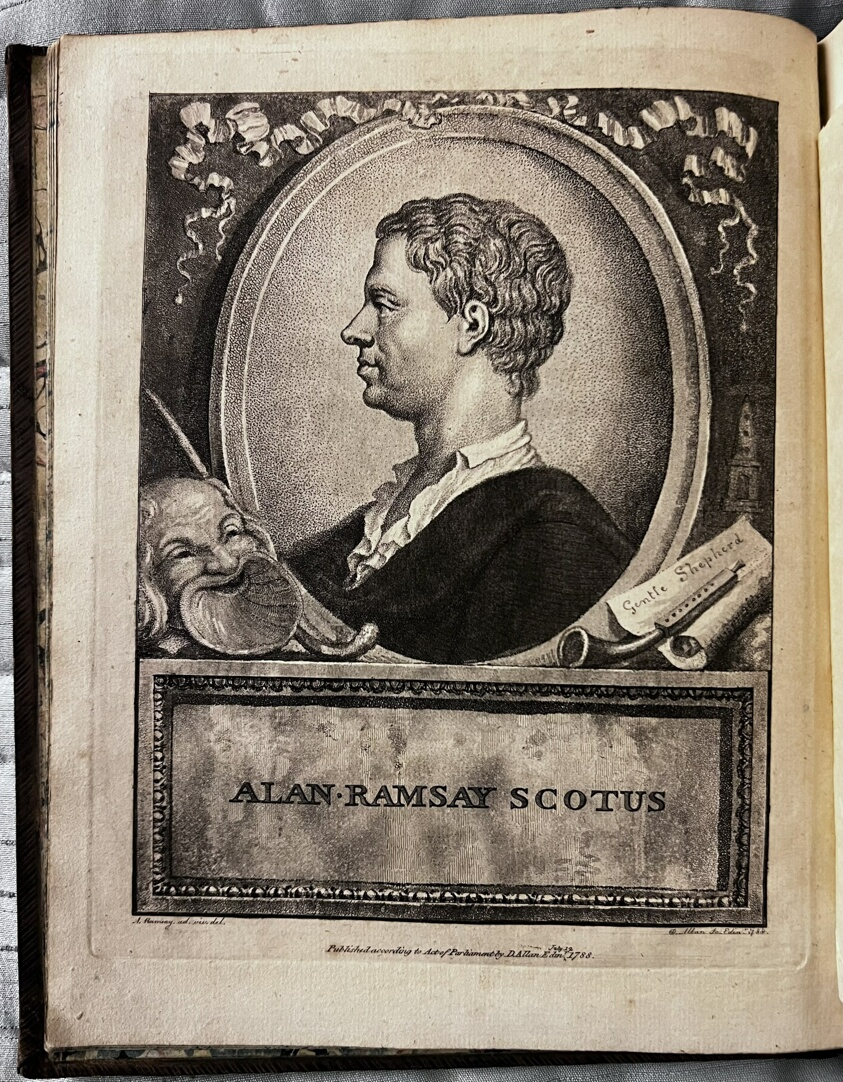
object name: Book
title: The Gentle Shepherd: a Pastoral Comedy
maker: David Allan (Scottish, 1744-1796); written by Allan Ramsay (Scottish, 1686-1758); printed by A. Foulis (Scotland, 18th century)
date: 1788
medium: Book with illustrations in etching and aquatint in black on cream laid paper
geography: Scotland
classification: book; paper; prints and drawing